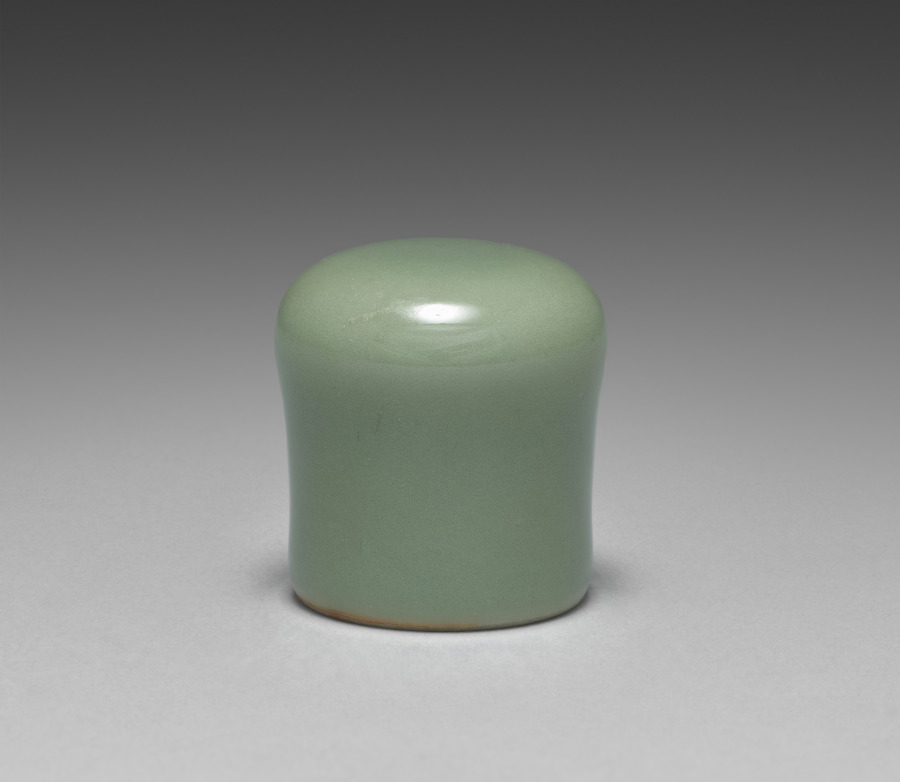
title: Roller End for Hanging Scroll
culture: Japan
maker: Seifū Yohei III (Japanese, 1851–1914)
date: 1893–1914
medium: One of a pair of hanging scroll roller ends; porcelain with celadon glaze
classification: Ceramic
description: Before entering into his apprenticeship with Yohei II, Seifū Yohei III trained as a painter in Osaka. He continued to paint throughout his career as a ceramist. As part of his ceramic practice, Yohei III also made roller ends to be placed at either end of the wooden dowel around which the lower part of a hanging scroll mounting is wrapped. These served both as weights for the painting and as knobs for handling it when rolling and unrolling. The pair here is made of porcelain with a green glaze.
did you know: This is one of two roller ends for the hanging scroll by Seifū Yohei III, Rain Clearing over a Summer’s Mountain, CMA 2022.151.